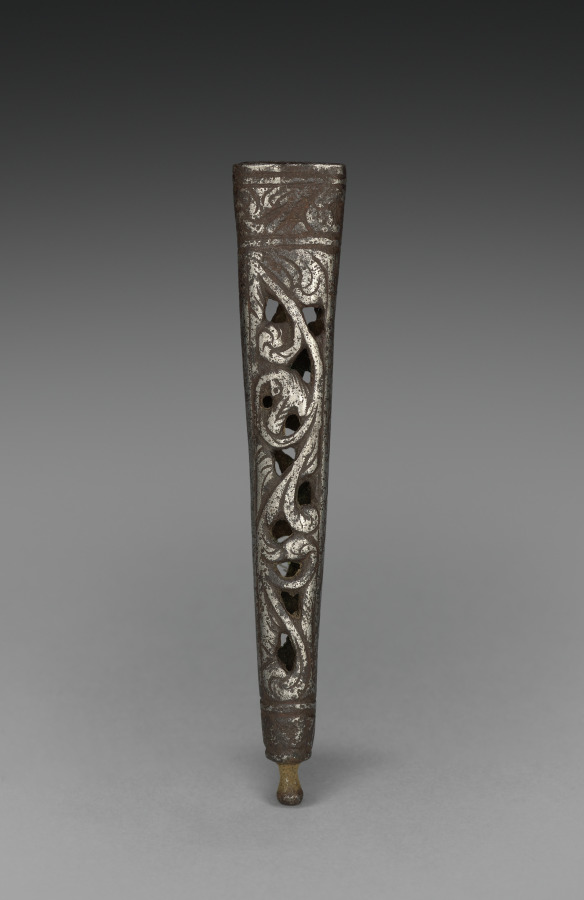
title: Sheath Tip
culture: Italy, 17th century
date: 1600s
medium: steel, pierced and chiseled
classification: Arms and Armor